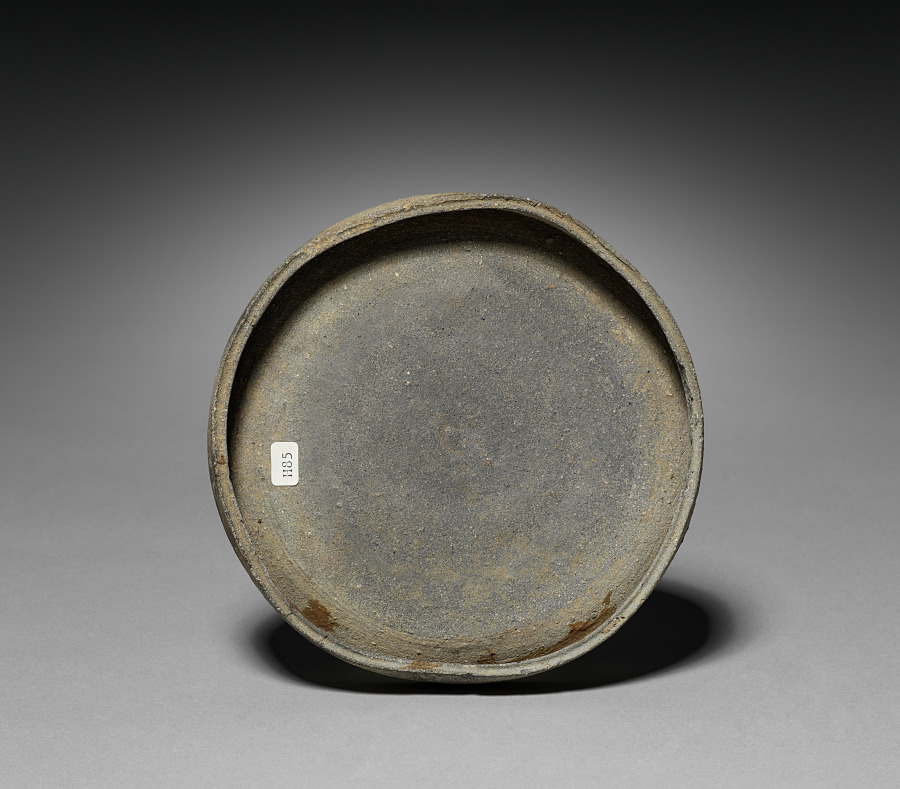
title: Cinerary Urn (lid)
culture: Japan, Heian period (794–1185)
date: c. 800–850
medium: stoneware with slight natural ash glaze (Sue ware)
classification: Ceramic